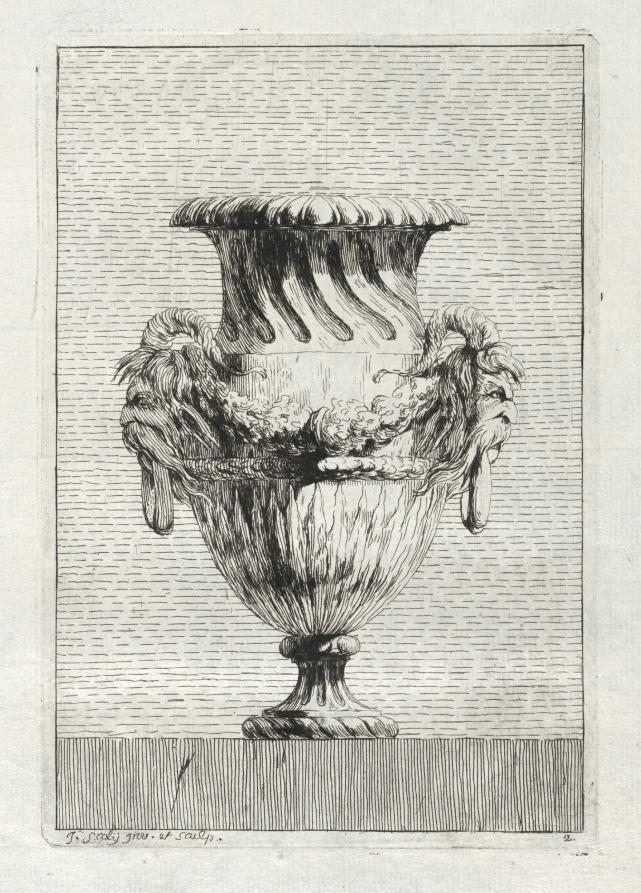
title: Suite of Vases: Plate 2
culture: France, 18th century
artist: Jacques François Saly (French, 1717–1776)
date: 1746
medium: etching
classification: Print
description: Designing ornamental vases or urns was particularly popular during the mid-18th century since the only limit to the possibilities was the imagination of the artist. Saly, a sculptor by training, was a student at the French Academy in Rome from 1740 to 1746, at which time he published a set of 30 etchings. Saly began with basic antique vase forms but deviated from classical ornament to use a rich variety of fantastic creatures for embellishment.